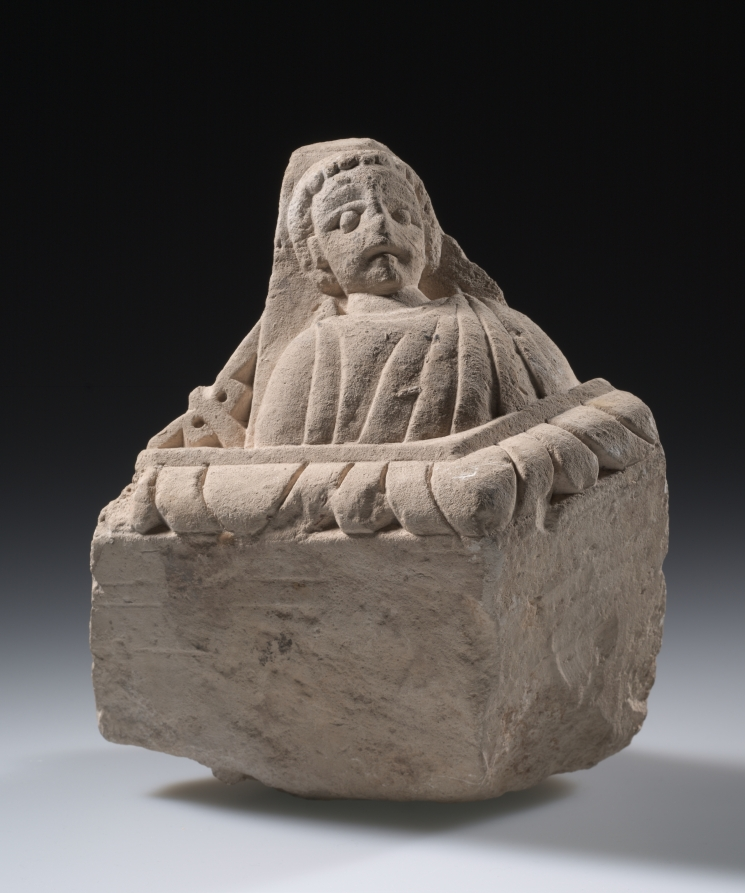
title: Cornerstone or Corbel (?)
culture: Egypt, Coptic period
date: 300s–400s CE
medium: limestone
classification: Sculpture